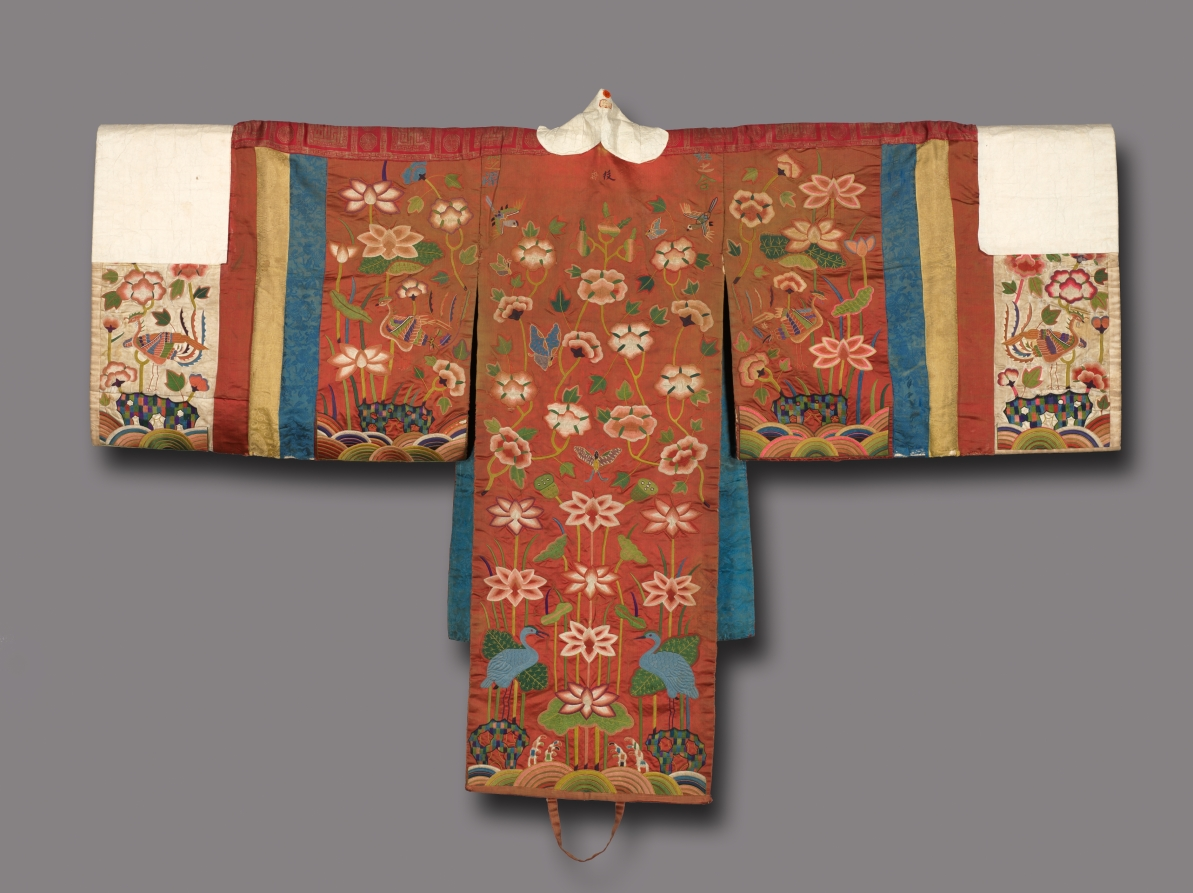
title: Bridal Robe (Hwarot)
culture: Korea, Joseon dynasty (1392–1910)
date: late 1800s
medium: Silk: satin weave; embroidery; paper edging on neck and sleeves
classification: Garment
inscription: 壽如河海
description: This bride's robe is exquisitely embroidered with various symbols of happiness in colorful silk threads. Butterflies stand for marital happiness; the phoenix, numerous offspring; and lotus flowers and white cranes, longevity. Yet, the bridal robe does not attest to the life of luxury. To the contrary, many traces of repairs, trimmings, and patchwork, reflect Joseon period women’s commitment to value neo-Confucian aesthetics of frugality and modesty. Substantial repairs and patching reveal that this robe served as an important communal resource to be shared and passed down through several generations. Its collar and sleeves are covered in thick white paper; this paper is replaced with new paper for each bride, while the robe itself was reused for decades.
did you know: This bride's robe is made of densely embroidered silk, but its collar and sleeves are covered in thick paper.